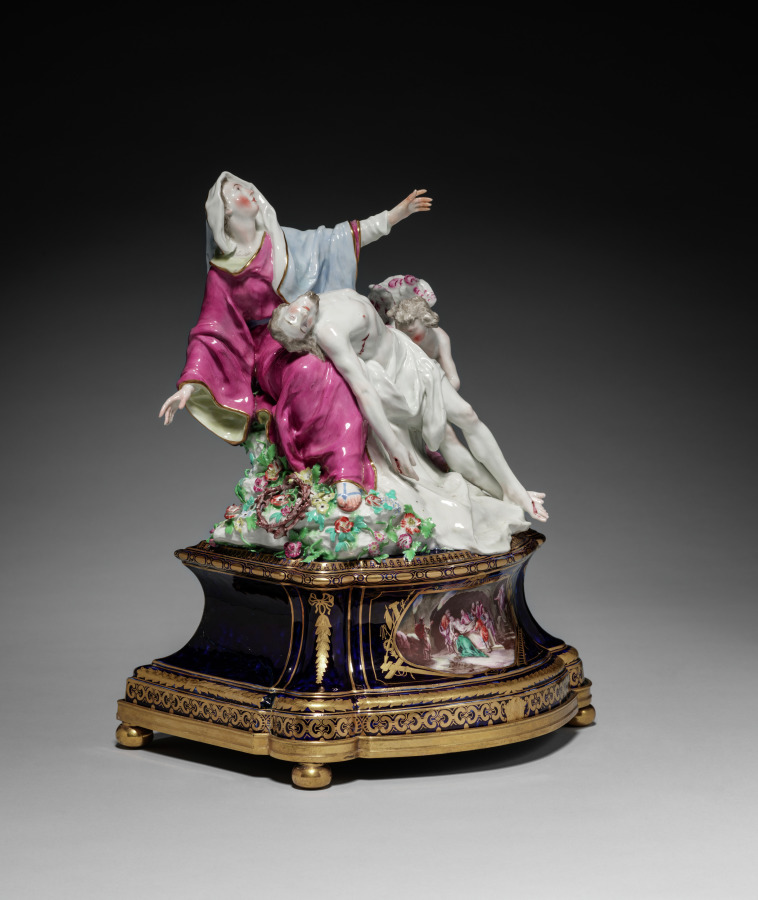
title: Figure of the Pietà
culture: England, London, Chelsea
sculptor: Joseph Willems (Flemish, 1715–1766)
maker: Chelsea Porcelain Factory (Britain, London, 1745–84)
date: c. 1761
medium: Soft-paste porcelain, painted in enamels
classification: Ceramic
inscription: Painted in gilt over the glaze at base of figure on the reverse: [a gold anchor]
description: The distinctively Roman Catholic subject of Mary cradling her son, the crucified Christ, suggests this figure was probably made for one of the aristocratic English families forced to practice their Catholicism in secret during the mid-1700s. Because of the laws banning Catholic worship in England, grand houses were often modified to include private chapels or rooms in private quarters where visiting priests delivered the sacraments in defiance of the laws favoring Protestant worship. A figure of this size and type likely would have served as an important devotional focal point within that context.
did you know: Only three examples of this figure by the Chelsea Porcelain Factory are known to exist.